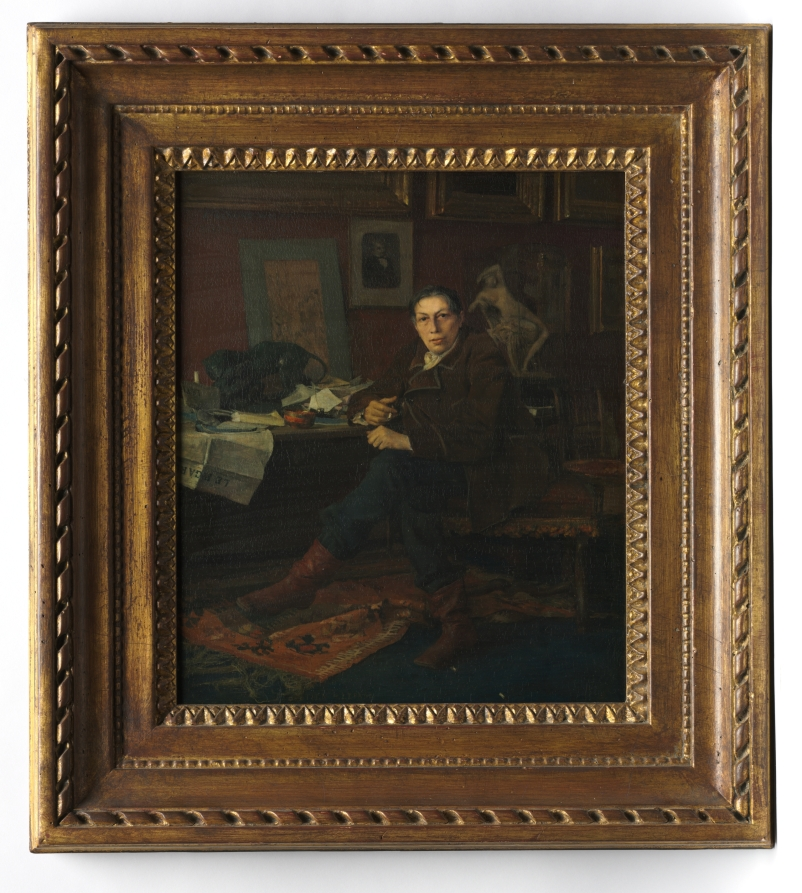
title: Albert Wolff in His Study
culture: France, 19th century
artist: Jules Bastien-Lepage (French, 1848–1884)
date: 1881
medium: oil on panel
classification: Painting